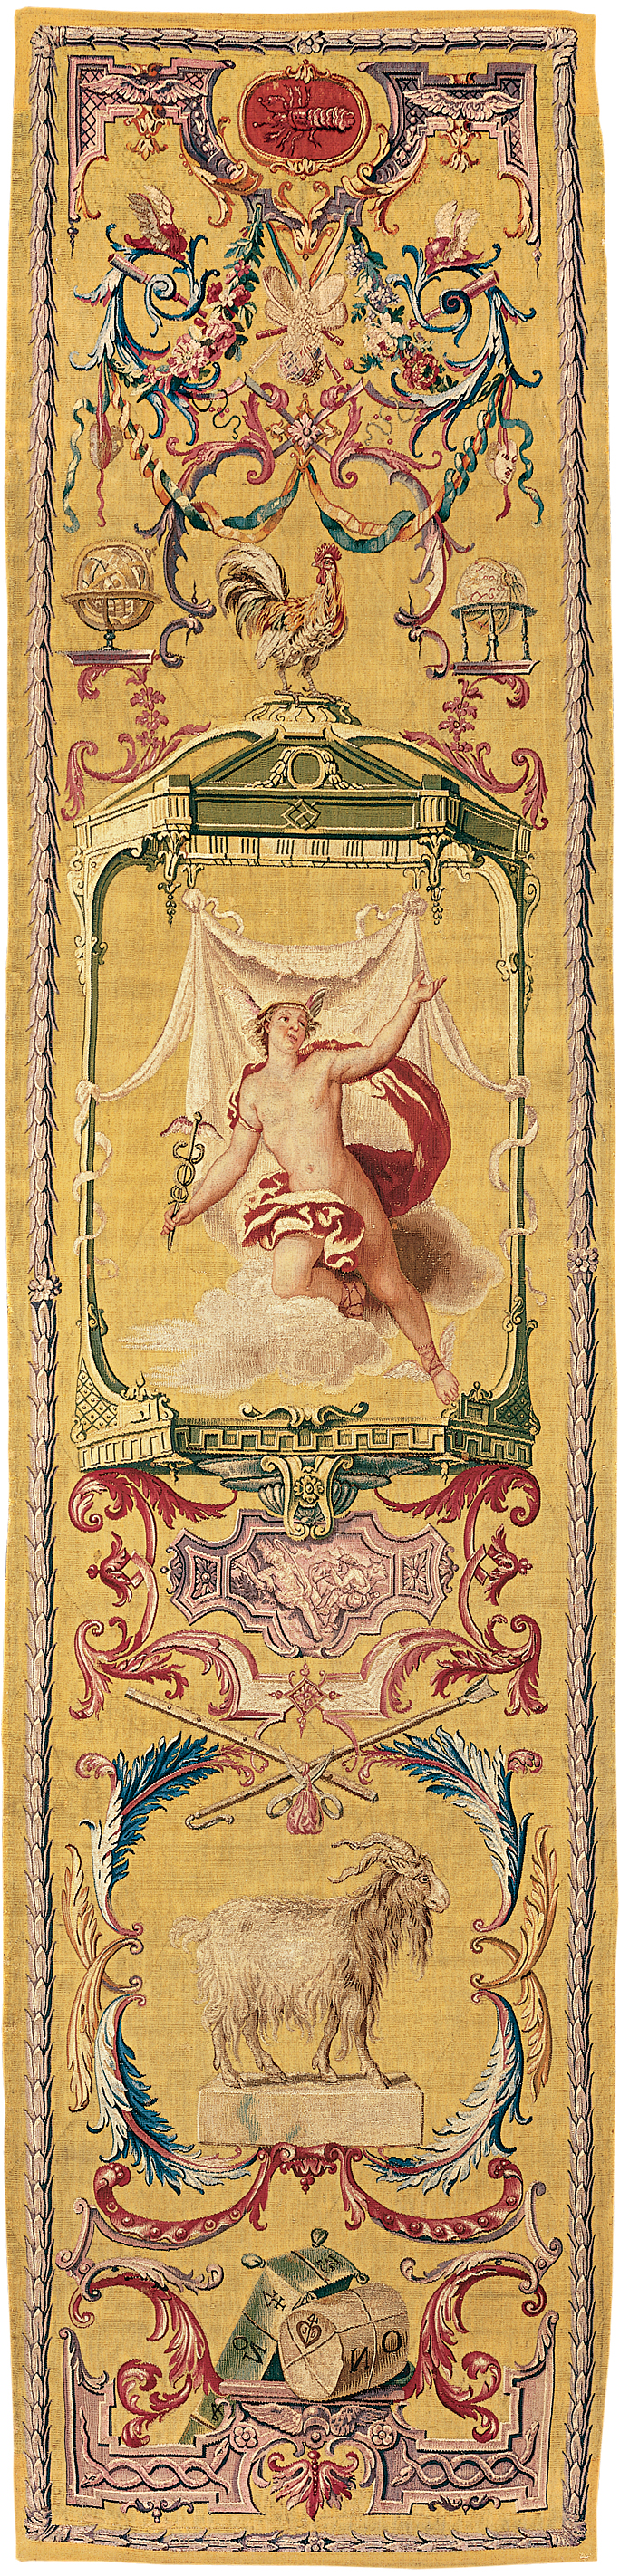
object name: Textile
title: The Month of June/The Sign of Cancer, from The Grotesque Months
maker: After a design by Claude III Audran (1658–1734), 1708–09; Woven at the Manufacture Royale des Gobelins; France, Paris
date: c. 1726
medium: Wool and silk, slit and double interlocking tapestry weave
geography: Paris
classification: weaving - tapestry; textile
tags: calendars, goats, acanthus, garlands, cartouches, balls, sports, roosters, globes, armillary sphere, wings, mantles, staffs, flight, mercury, crabs, gods (deities)